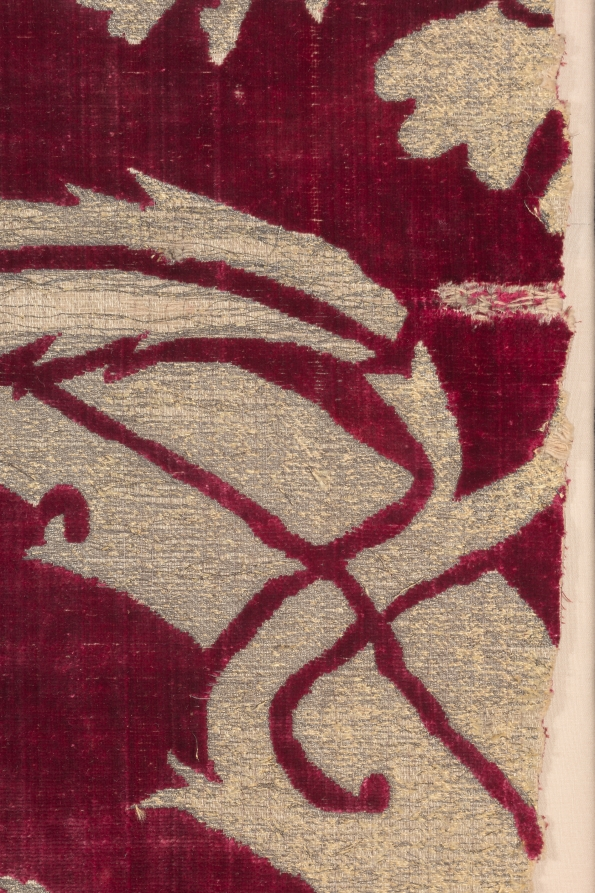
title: Brocaded Velvet Panel with Italianate Pattern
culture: Turkey, Istanbul or Bursa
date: 1575–1625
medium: Silk: velvet, brocaded; gilt-metal thread and cotton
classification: Velvet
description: Rarely are four fabric widths preserved together from any culture. This gilt-metal thread pattern combines Turkish and Italian features: the large ogival (curved) lattice clasped by crowns and the velvet structure are Turkish, and the two so-called artichoke designs are enlarged adaptations of Italian motifs. A symbol of wealth and power, this velvet panel was woven during the artistic height of the Ottoman Empire in the late 1500s. It may have covered a divan (sofa) or possibly enhanced a wall during cold winters in the imperial Topkapi Palace in Istanbul.